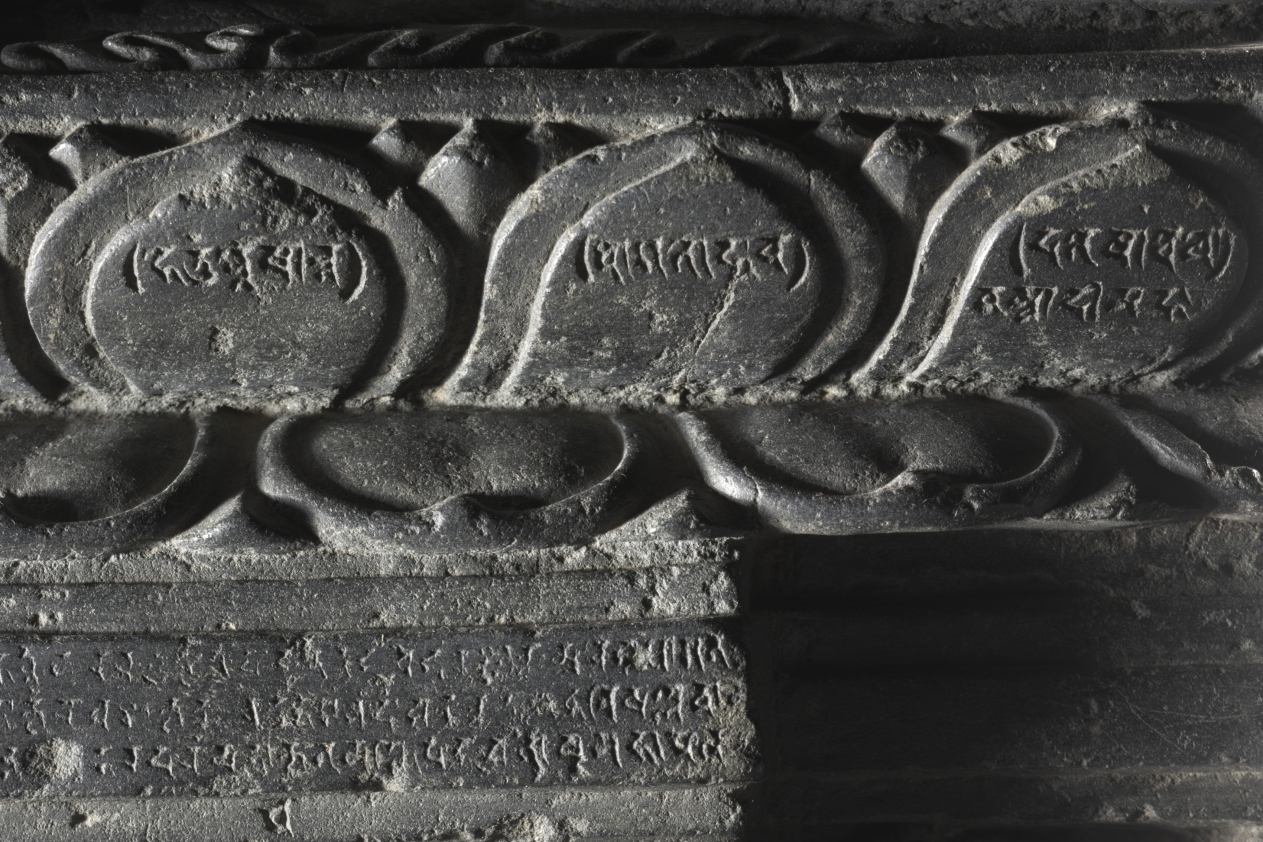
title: Buddha Calling on Earth to Witness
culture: Northeastern India, Bihar, Tetravan, Pala Period (750-1197)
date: 800s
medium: chloritic schist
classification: Sculpture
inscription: Ye dharmā hetu prabhavā tesā hetu tathāgata hya vadat...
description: This sculpture is one of a series that depict the Buddha at different scenes in his life. Here, he is at Bodhgaya, the place where he achieved enlightenment. At the top of the composition are the branches of the ficus tree with its heart-shaped leaves, under which he achieved enlightenment. His hand gesture indicates that he is calling upon the goddess of the earth to witness the moment. During the Pala period of the eighth through 12th centuries in medieval India, Buddhism dominated and flourished in major monastic universities. After the fall of the Pala dynasty, the numerous battles between small kingdoms vying for power caused the destruction of the Buddhist monasteries, and Buddhist monks fled with texts and movable art to Nepal, Tibet, and Southeast Asia, so that by the 14th century, Buddhism was eradicated in India.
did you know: The donors kneel at the lower corners.